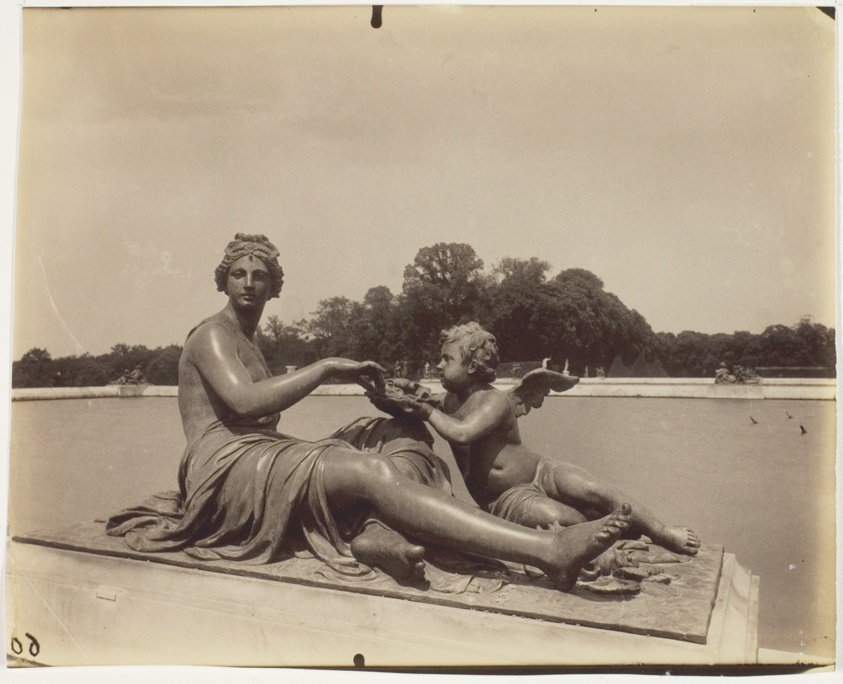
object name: Photograph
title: Versailles, Coin de Parc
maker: Jean-Eugène-Auguste Atget (French, 1857–1927)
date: 1901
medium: Albumen print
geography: France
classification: albumen silver print; photographic process; photography; photograph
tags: Collected by Hugh Edwards